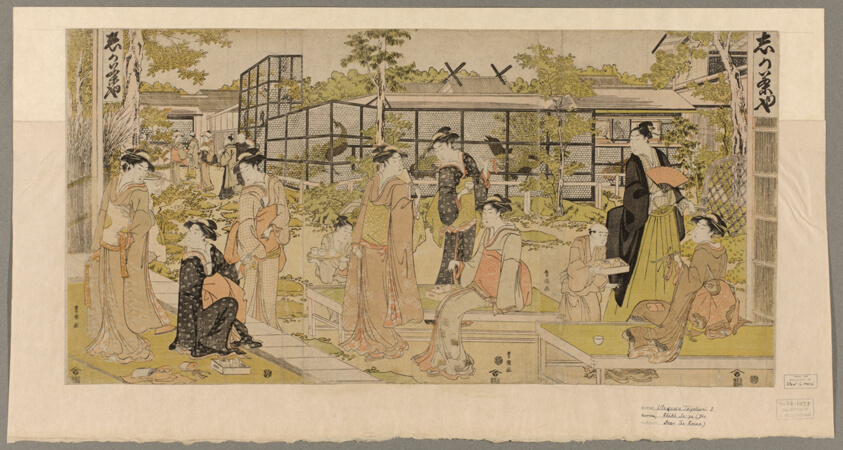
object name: Print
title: Kacho chaya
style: Japanese (culture or style)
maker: Utagawa Toyokuni I 初代 歌川 豊国; Japanese, 1769–1825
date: c. 1792/93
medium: Color woodblock print; oban triptych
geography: Japan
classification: woodblock print; print; asian art